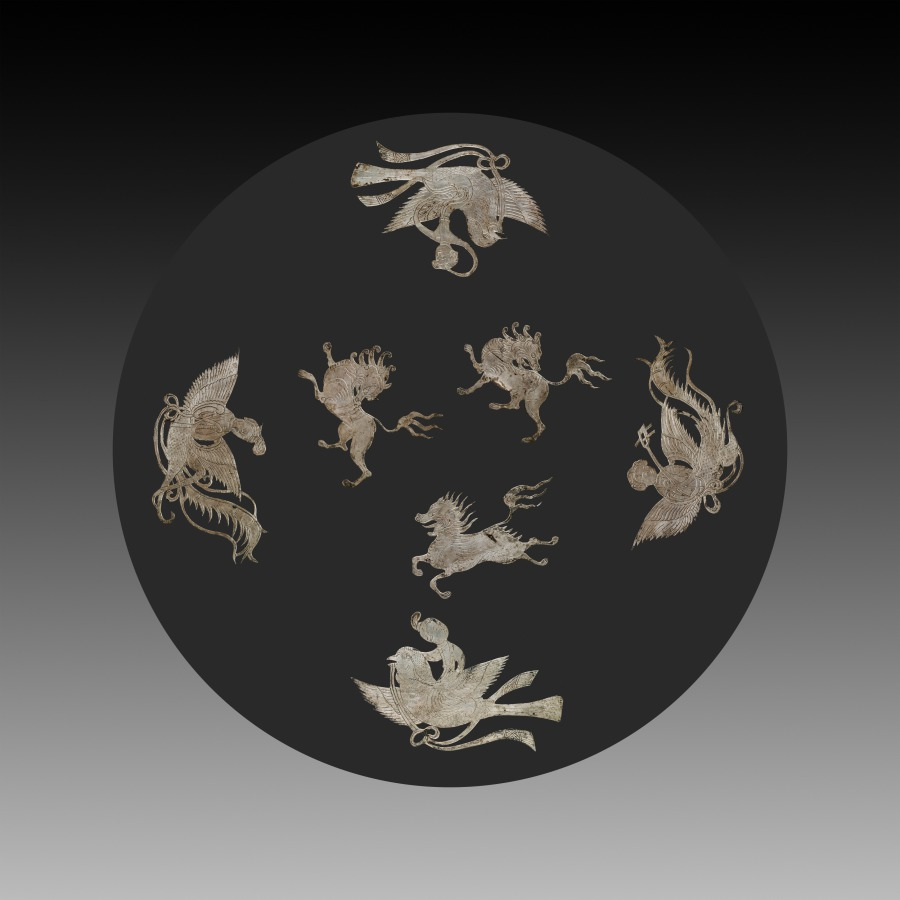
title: Inlays for a Mirror or Box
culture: China, Tang dynasty (618-907) - Song dynasty (960-1279)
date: c. 900–1000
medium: beaten silver with chased details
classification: Metalwork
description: The p'ing-t'o technique of inlaying gold and silver foil on lacquer produced luxurious articles of elegance and fragility. These stray silver inlays were originally mounted on a mirror back or a cosmetic box whose lacquered surface has disintegrated. They combine auspicious symbols of Indian and Chinese origin: human-headed birds whose melodies filled the Buddhist paradise, and bird-riding deities who inhabited the skies of Taoist mythology. Like these imaginary beings, the lions were probably paired in a radial design; at least one has been lost.